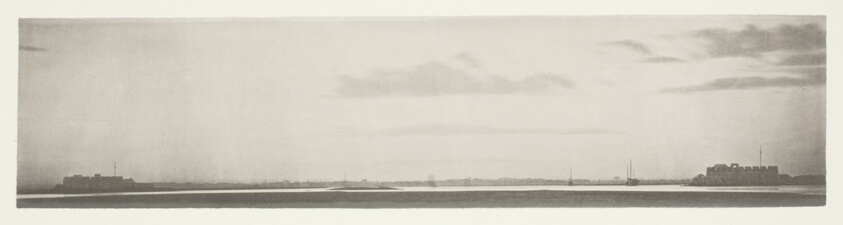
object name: Photograph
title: Hoi-How, the Proposed New Treaty Port, Island of Hainan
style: 19th century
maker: John Thomson (Scottish, 1837–1921)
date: c. 1868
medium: Collotype, pl. XII from the album "Illustrations of China and its People, Volume I" (1873)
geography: Scotland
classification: photography; photograph